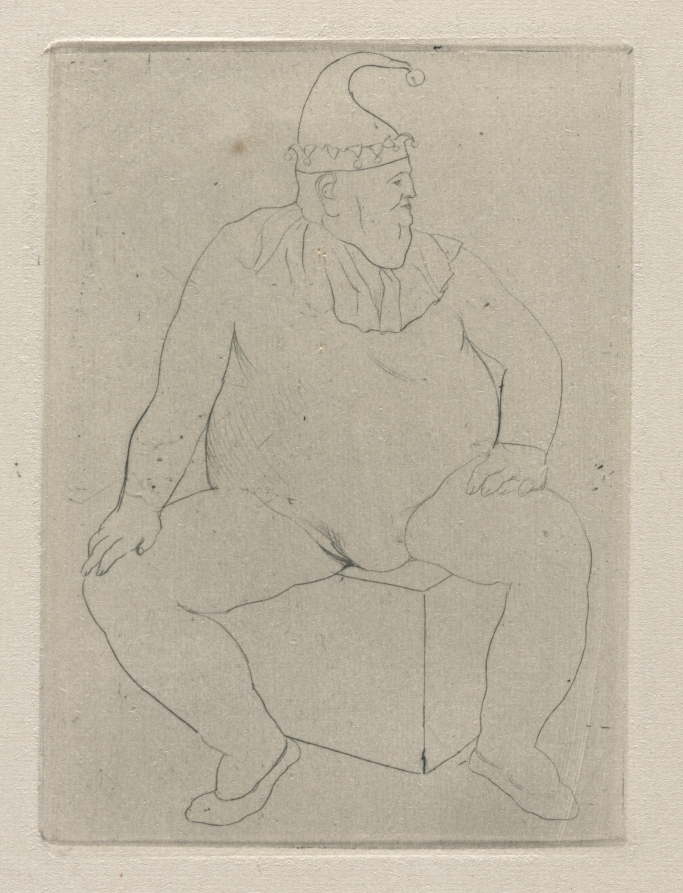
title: Saltimbanque at Rest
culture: Spain, 20th century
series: The Saltimbanques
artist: Pablo Picasso (Spanish, 1881–1973)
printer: Louis Fort (French, active 1800s–1900s)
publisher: Ambroise Vollard (French, 1867–1939)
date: 1905, printed 1913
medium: drypoint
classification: Print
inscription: Watermark: [Van GELD]ER ZONEN